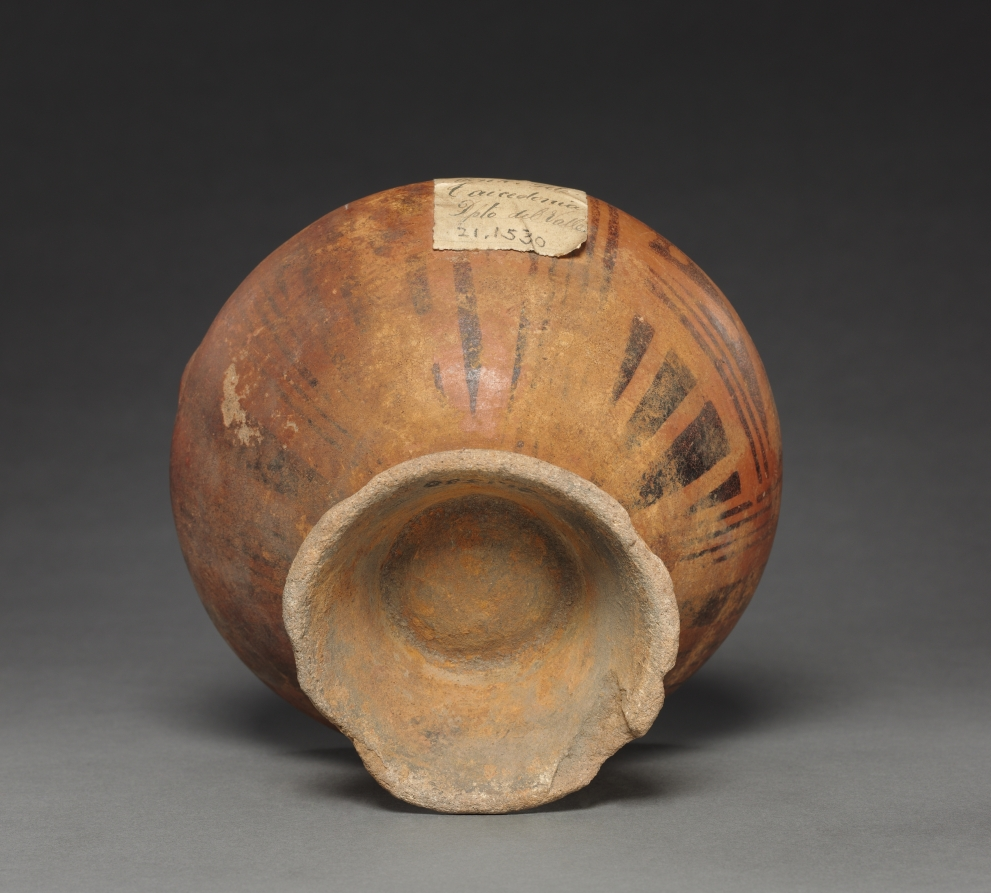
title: Vase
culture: Colombia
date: before 1550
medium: red ware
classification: Ceramic